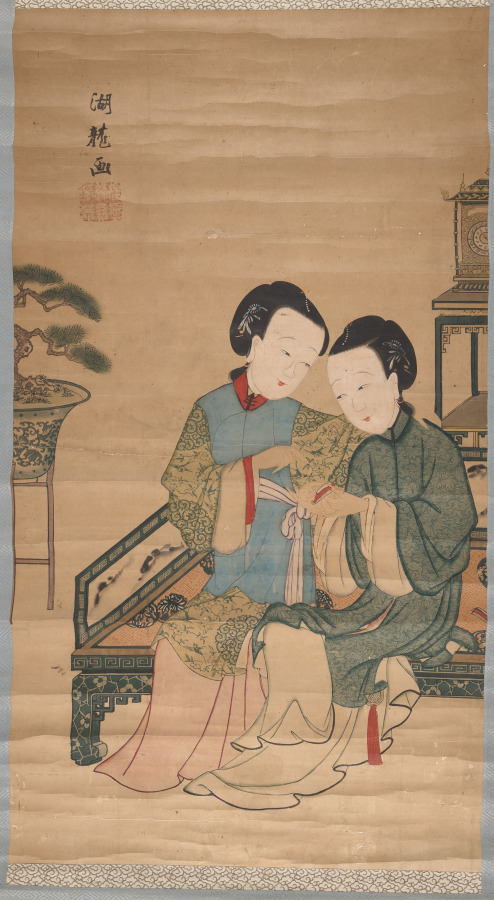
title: Two Beauties Inspect a Golden Lotus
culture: China, Qing dynasty (1644–1911), Qianlong period (1736–95)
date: 1736–95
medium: Hanging scroll; polychrome woodblock print; ink and color on paper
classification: Print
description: In the 1600s, printing flourished in such Jiangnan cities as Nanjing, Suzhou, Hangzhou, and Huizhou, evolving from privately enjoyed illustrated books printed in color to more commercialized single-sheet color prints that were hung on walls and became part of the rich urban visual culture.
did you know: Woodblock printing in color reached a height in China in the 1600s to 1700s. The prints were executed by means of sets of separate blocks, each carved to print a different color.